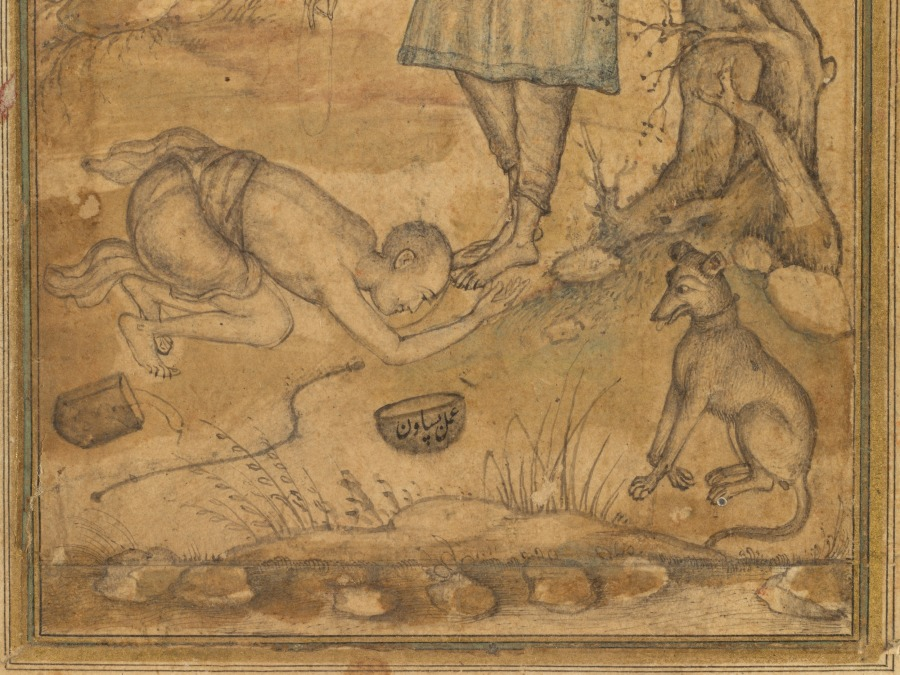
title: A mendicant bowing before a holy man, from the Prince Salim Album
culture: Mughal India, court of Akbar (reigned 1556–1605)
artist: Basavana (Indian, active c. 1560–1600)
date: c. 1585; inner border added in Allahabad c. 1602; outer border added probably 1900s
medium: Gum tempera, ink, and gold on paper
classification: Painting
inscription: Persian inscription on mendicant’s bowl, in nasta‘liq script: the work of Basavana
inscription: Persian verse at top from a ghazal (lyrical poem) of Hafiz (Persian, 1325–1389), in nasta‘liq script: I have fallen at his feet, grieving and wailing./ Could it be that I might receive a helping hand?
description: As the Mughal atelier grew into the 1580s, Indian artists become increasingly adept at incorporating Persian styles with a new dimensionality and naturalism that Akbar promoted, possibly based on his appreciation of European prints and paintings. Here, a sincere holy man wears robes tinged lightly with blue. He stands beneath a tree in the wilderness with a loyal jackal by his side. A devotee touches his head to his feet. The artist’s tiny signature is written on the alms bowl. Connoisseurs of Persian art in the Islamic world praised an artist’s virtuoso ability to work on a microscopic scale.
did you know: The dog stares hungrily at the mendicant’s alms bowl, with the artist’s signature.